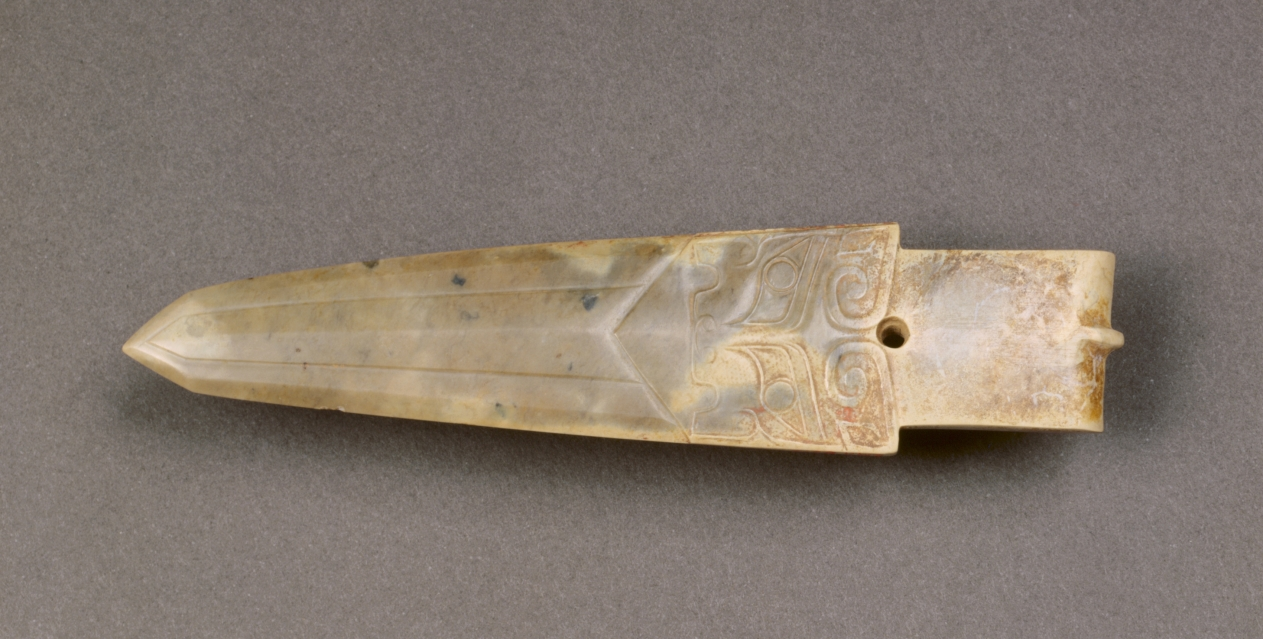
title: Ceremonial Dagger-Axe with Animal Masks (Ge)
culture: China, Shang dynasty (c. 1600–c. 1046 BCE)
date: c. 1600–1050 BCE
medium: jade (nephrite)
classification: Jade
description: Jade is an extremely hard material. In ancient China, it was carved or ground with fine abrasives, such as quartz sand, affixed to cutting or drilling tools. The form of this jade (ge, ceremonial dagger axe), was likely derived from similarly shaped bronze weapons. The pointed and slightly curved blade was symmetrically carved. It seems to emerge from the mouth of the taotie, the animal mask. The taotie’s curved horns were carved in relief bands; its eyes, snout, and upper jaw are delineated in threadlike relief. Similar taotie designs are also seen on bronze vessels of the same period. The hole in the tang indicates where the blade was originally attached to a wooden shaft.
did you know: Traces of vermilion or cinnabar remain on the taotie mask design.